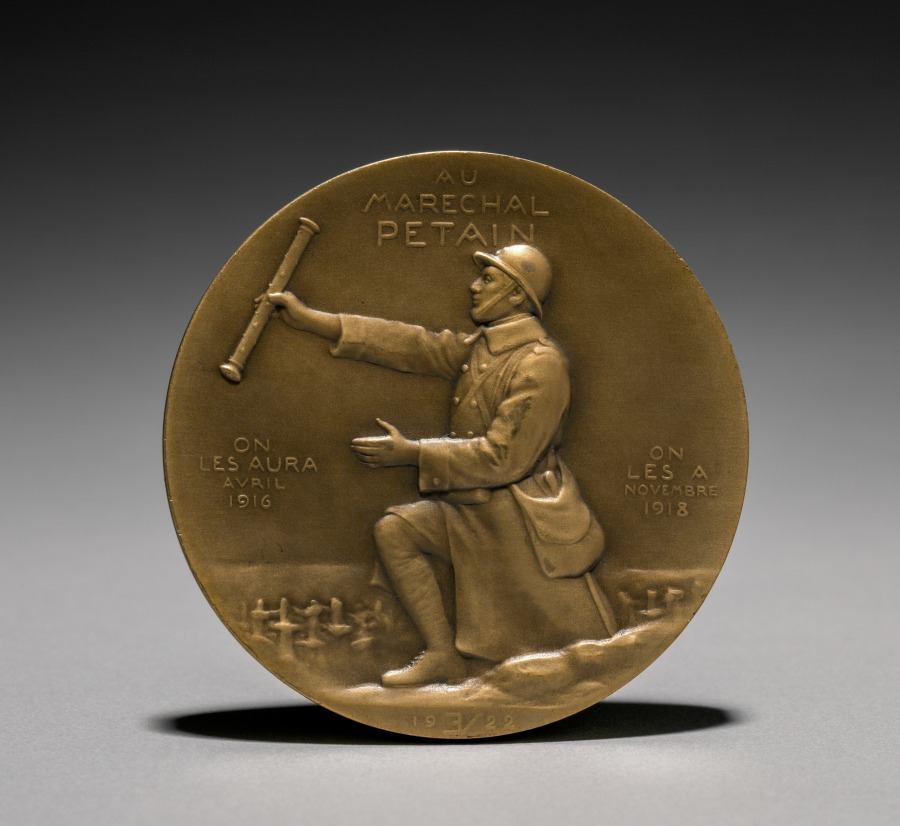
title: Petain Medal (reverse)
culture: France, early 20th century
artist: Èmile Séraphin Vernier (French, 1852–1927)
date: 1922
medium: bronze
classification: Metalwork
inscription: "AU MARECHAL PETAIN. ON LES AURA AVRIL 1916. ON LES A NOVEMBRE 1918."